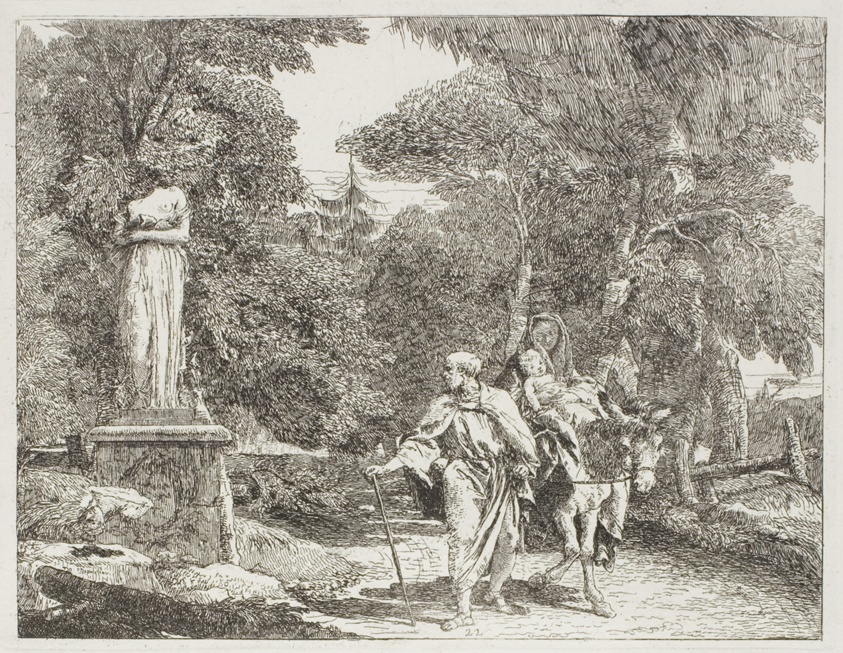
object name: Print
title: The Holy Family Passing a Statue, the Head of Which Falls to the Ground, plate 22 from The Flight into Egypt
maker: Giovanni Domenico Tiepolo (Italian, 1727-1804)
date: 1753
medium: Etching on paper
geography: Italy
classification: etching; print; prints and drawing